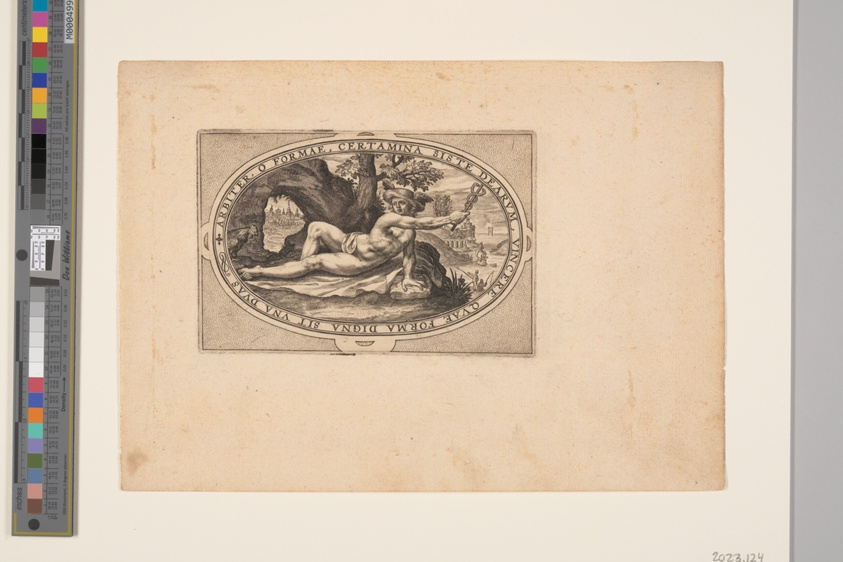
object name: Print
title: Mercury, from Gods and Goddesses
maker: Crispijn van de Passe I; Dutch, c. 1565–1637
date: 1592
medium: Engraving on paper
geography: Netherlands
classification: engraving; paper; print; prints and drawing